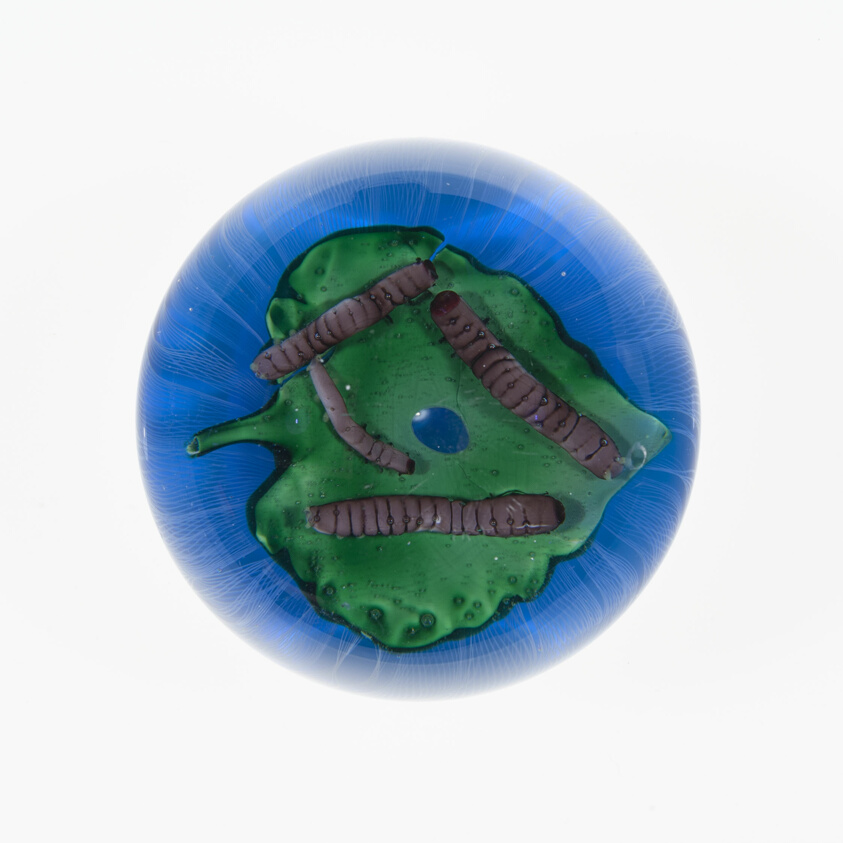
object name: Glass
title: Paperweight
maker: Monot, Pere et Fils, et Stumpf; Cristallerie de Pantin (French, 1850-1890)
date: c. 1878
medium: Glass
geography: France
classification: paperweight; european decorative arts; glass